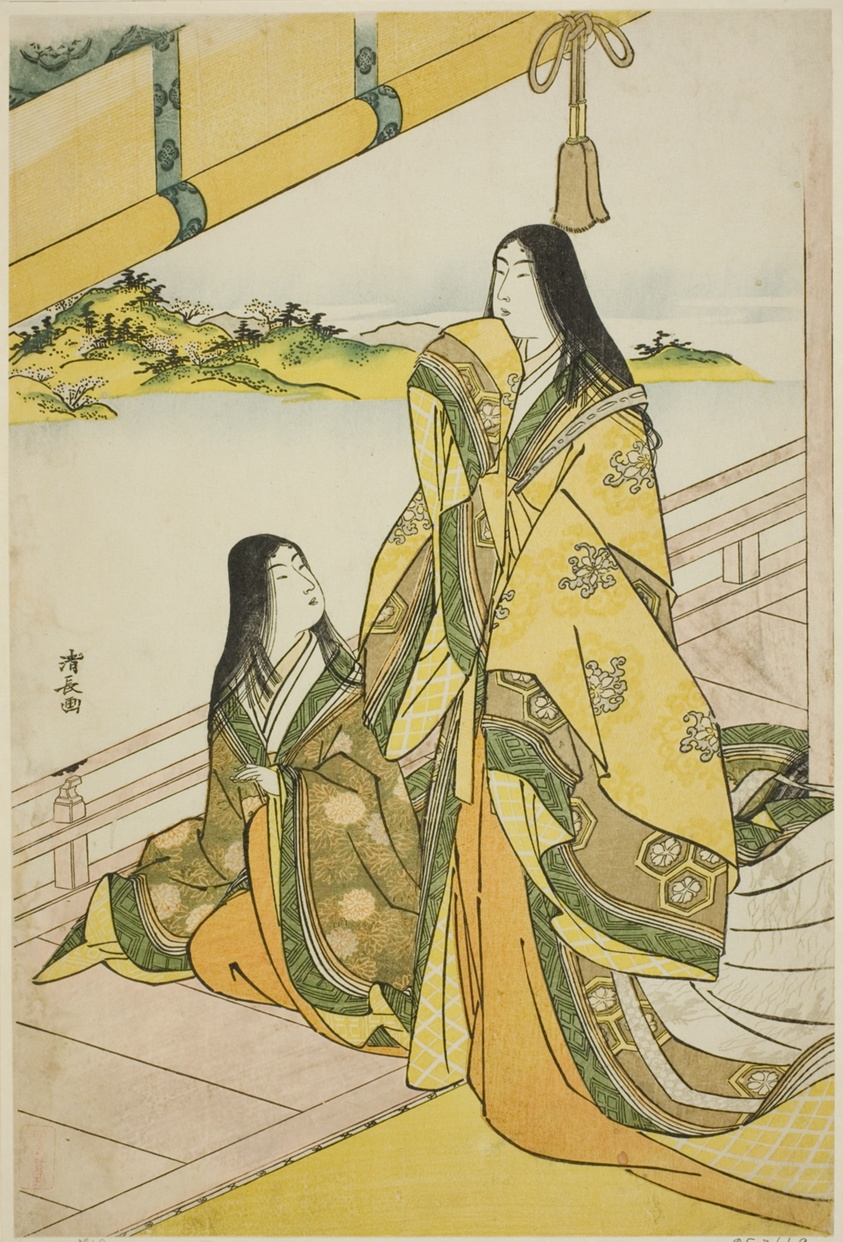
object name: Print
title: Sei Shonagon and Her Companion, from an untitled series of court ladies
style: Japanese (culture or style)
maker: Torii Kiyonaga (Japanese, 1752-1815)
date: c. 1784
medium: Color woodblock print; oban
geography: Japan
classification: woodblock print; print; asian art